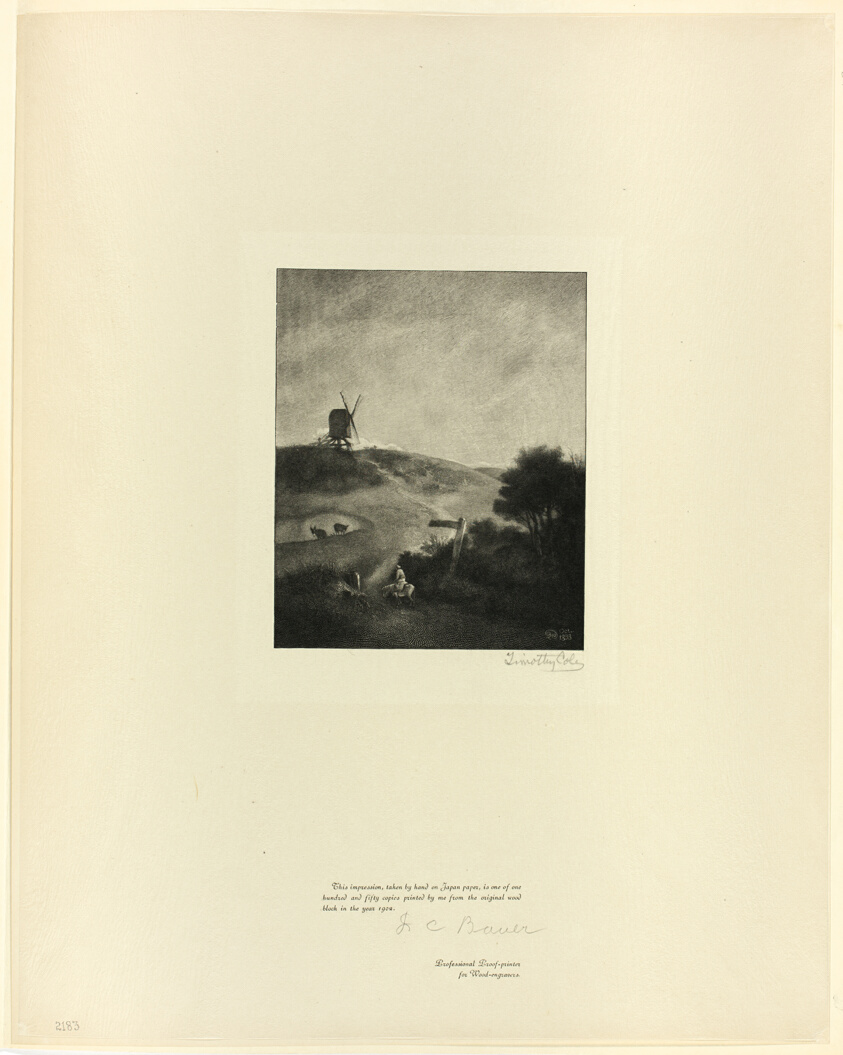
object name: Print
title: The Windmill, from Old English Masters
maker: Timothy Cole (American, born England, 1852-1931); after John Crome (English, 1768-1821)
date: 1899, printed 1902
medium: Wood engraving on chine paper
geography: United States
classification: wood engraving; print; prints and drawing